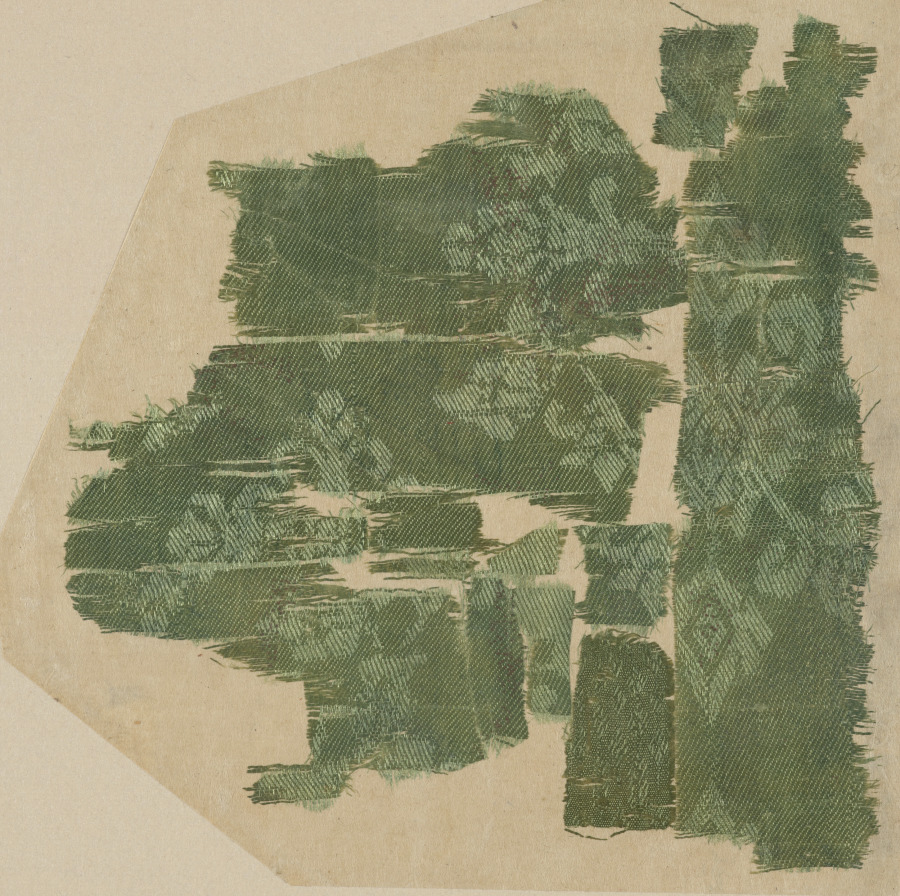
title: Fragment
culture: China, 8th century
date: 700s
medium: silk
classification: Textile